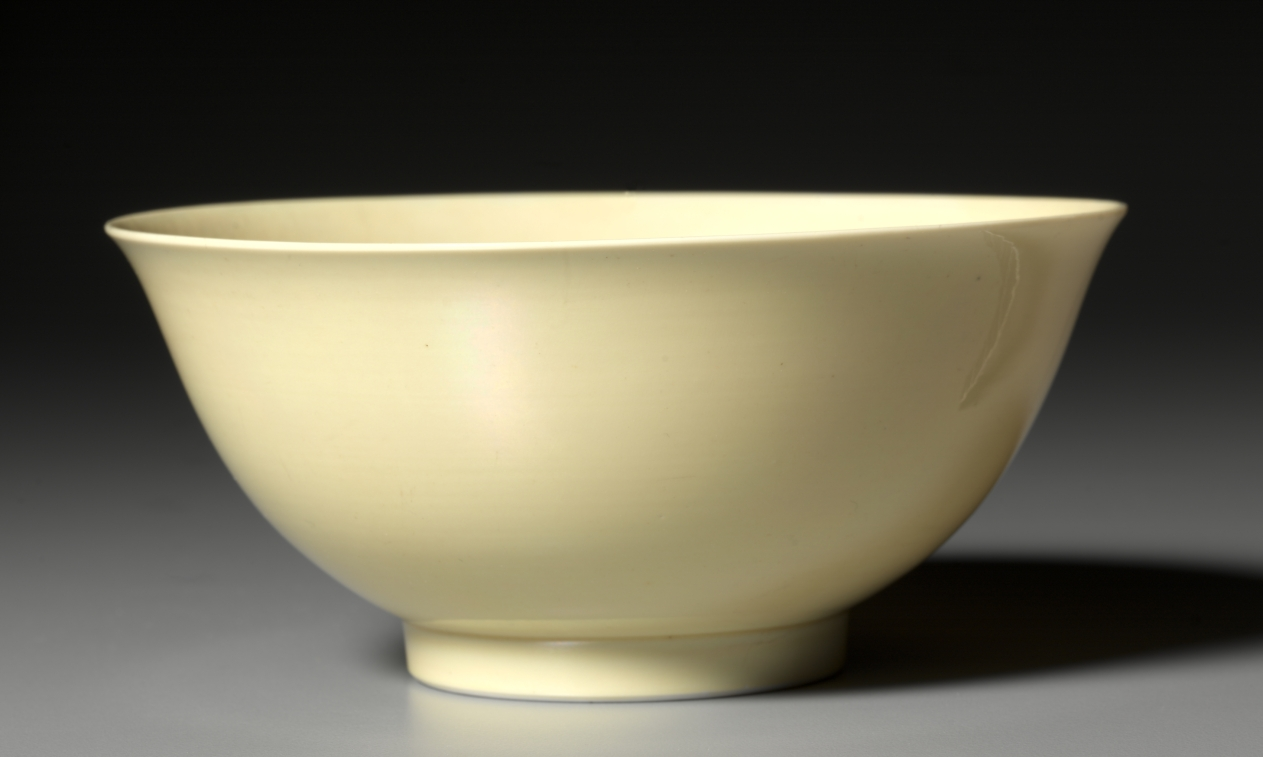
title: Bowl with Yellow Glaze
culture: China, Qing dynasty (1644-1911), Yongzheng mark and reign (1723-35)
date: 1723–35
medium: glazed porcelain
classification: Ceramic